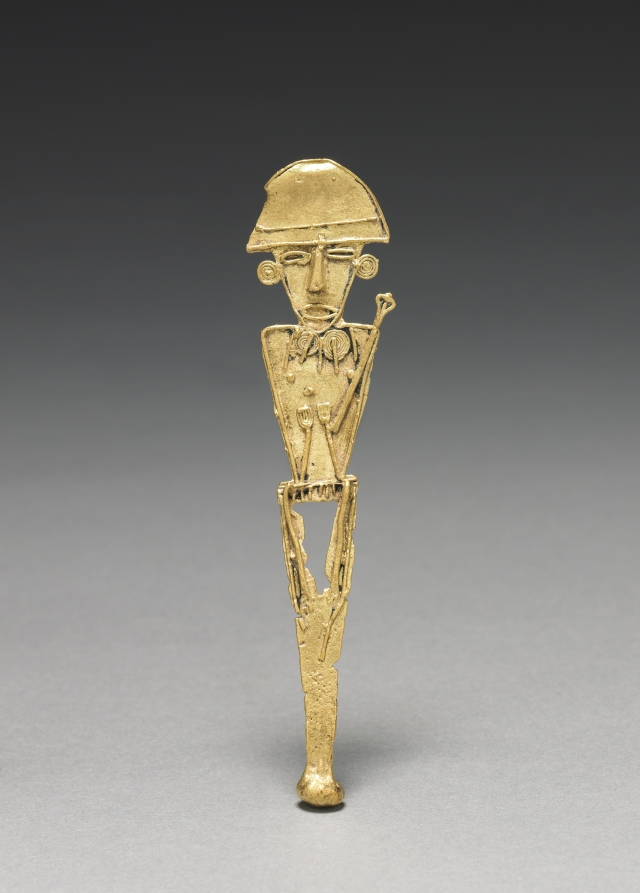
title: Tunjos (Votive Offering Figurine)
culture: Colombia, Muisca style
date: c. 900–1550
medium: cast gold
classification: Metalwork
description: Unlike the other gold ornaments made in the isthmian region, tunjos were not worn; instead, they served as offerings that were deposited in sacred places such as lagoons and caves. They often depict humans who hold something. Perhaps because they were not meant for display, tunjos were not finished after lost-wax casting. Flaws remain uncorrected, surfaces are unpolished, and gold that backed into the channel used to pour the molten metal into the mold was left in place.